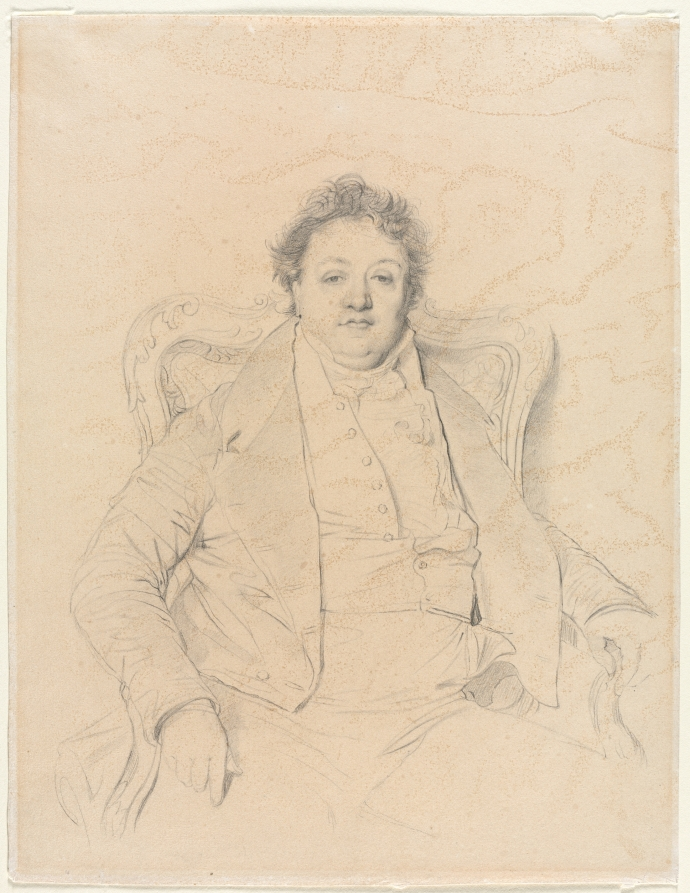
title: Charles Thévenin, after Ingres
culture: France, 19th century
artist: after Jean-Auguste-Dominique Ingres (French, 1780–1867)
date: 1800s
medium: graphite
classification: Drawing